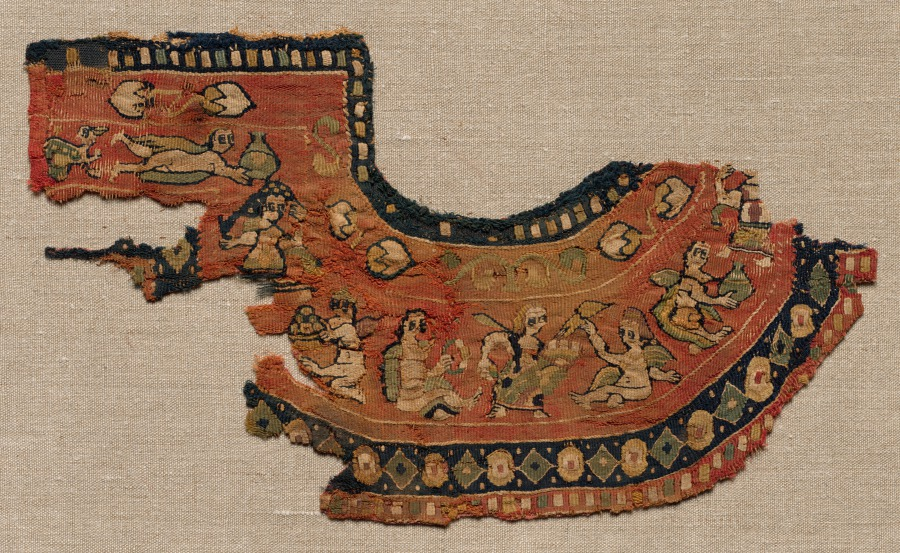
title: Fragment, Ornamental Neck Band from a Tunic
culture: Egypt, Umayyad period (661–750)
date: 650 – 699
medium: tapestry; linen and wool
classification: Textile